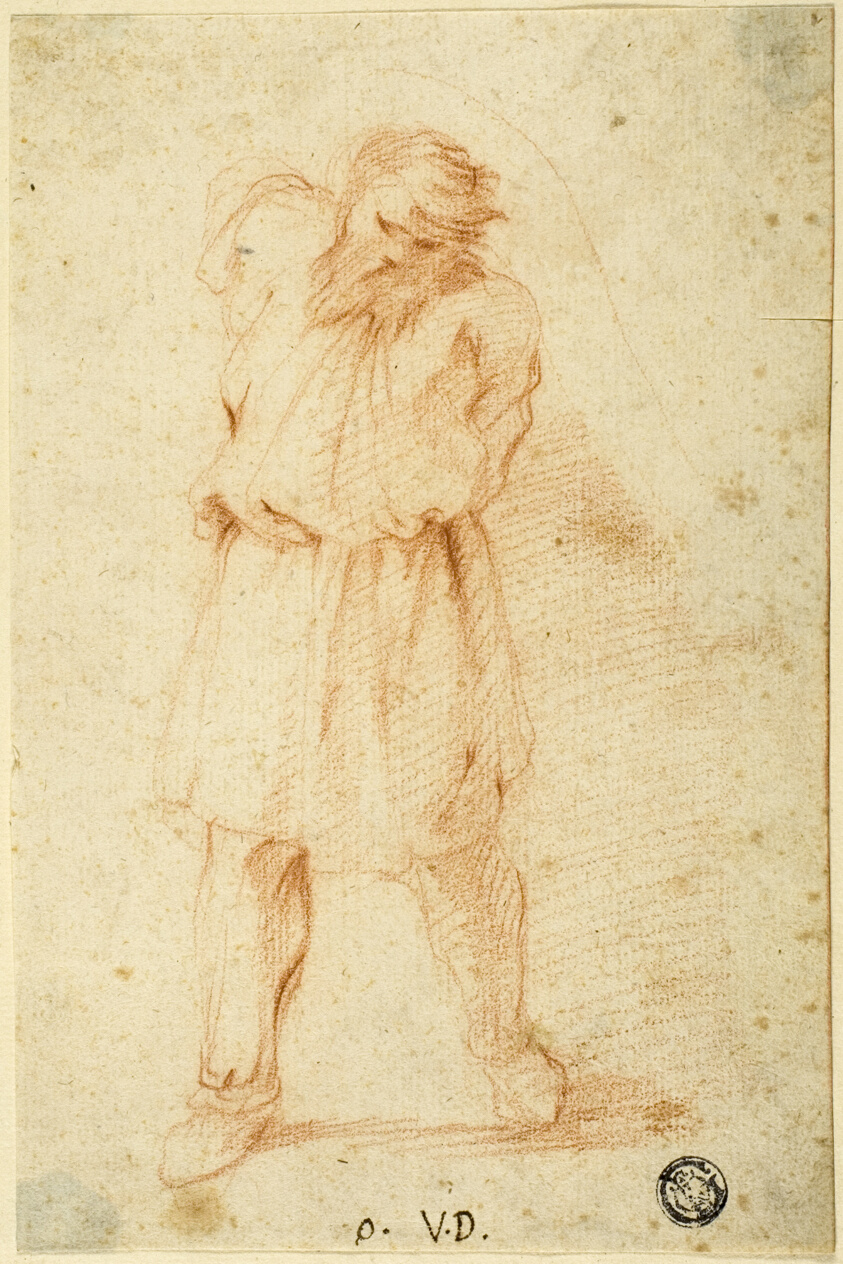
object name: Drawing and Watercolor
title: Figure with Arms Tied Behind His Back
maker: Attributed to Vincenzo Dandini (Italian, 1607-1675); or Filippo Napoletano (Italian c. 1578-1640)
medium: Red chalk on ivory laid paper, tipped onto buff laid paper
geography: Italy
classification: chalk; drawings (visual works); prints and drawing